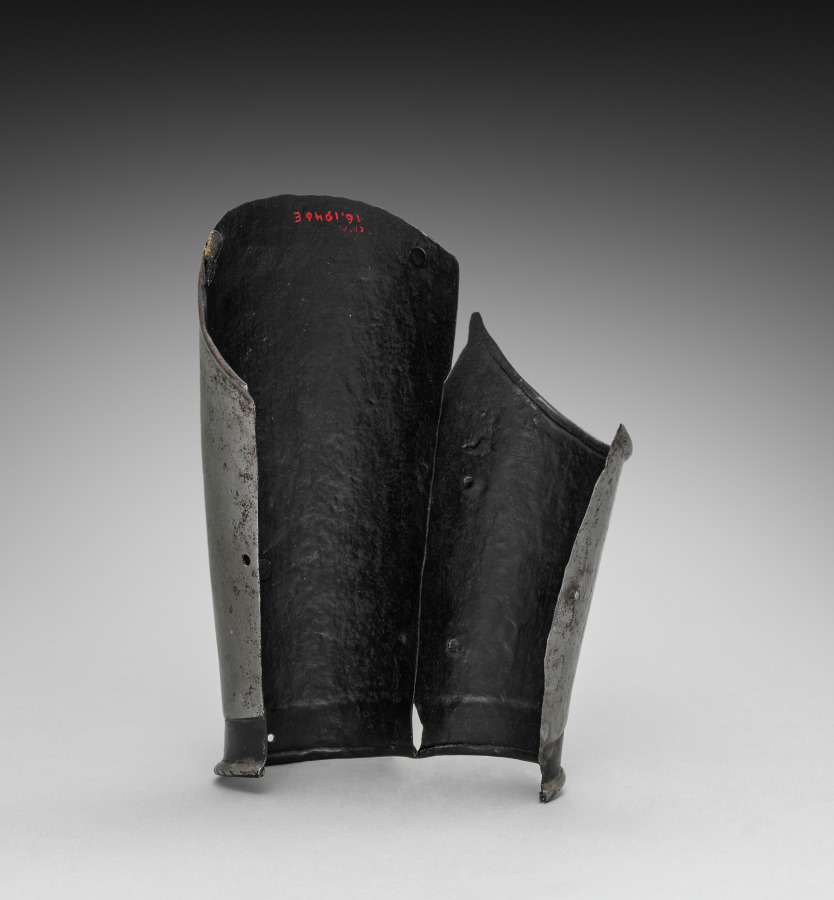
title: Left Vambrace (lower cannon)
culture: Germany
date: c.1550–1570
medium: iron, steel, leather and brass rivets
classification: Arms and Armor